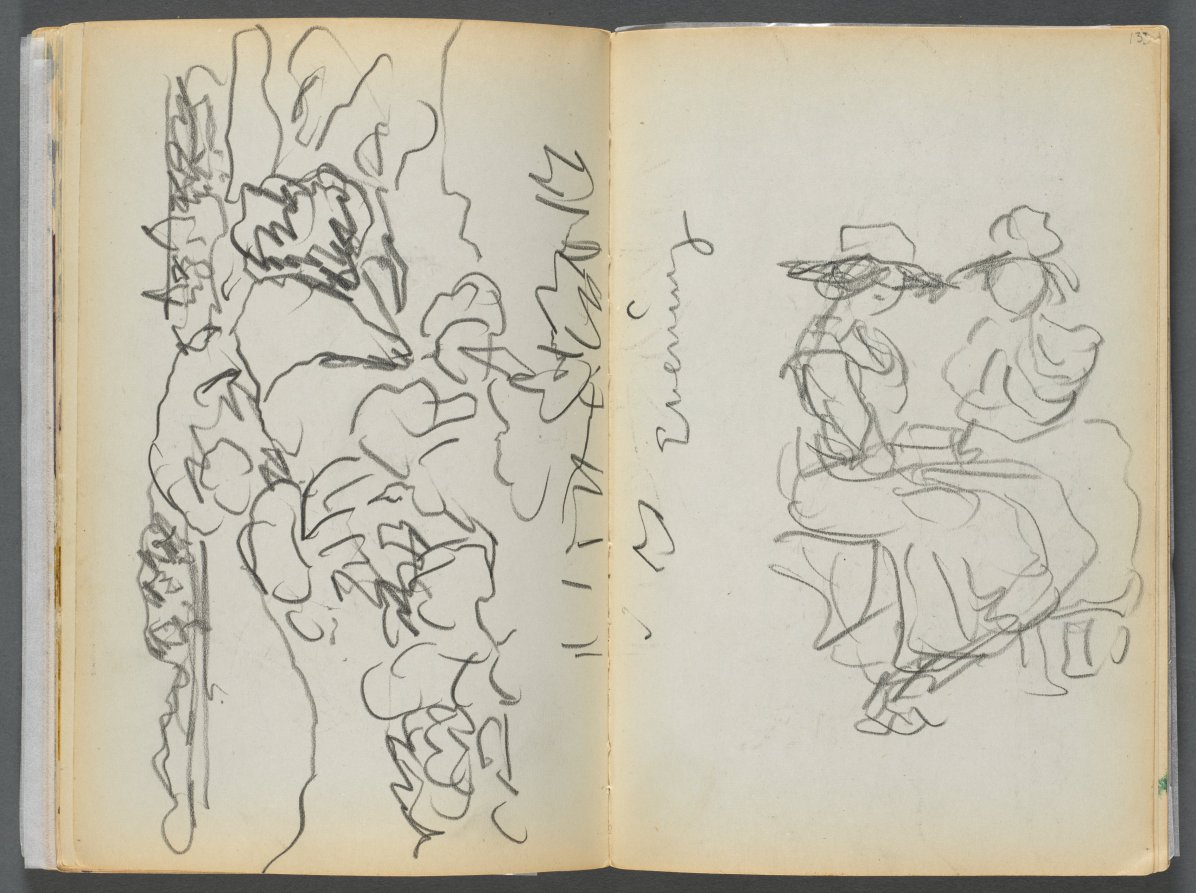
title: Sketchbook- The Granite Shore Hotel, Rockport, page 134 & 135: "Evening"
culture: America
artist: Maurice Prendergast (American, born Newfoundland [now Canada], 1858–1924)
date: 1905–10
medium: graphite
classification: Bound Volume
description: This sketchbook contains 72 pages of pencil drawings and 9 watercolors of Cape Ann. On the inside of the cover Prendergast wrote the address of the Granite Shore Hotel in Rockport, Massachusetts.